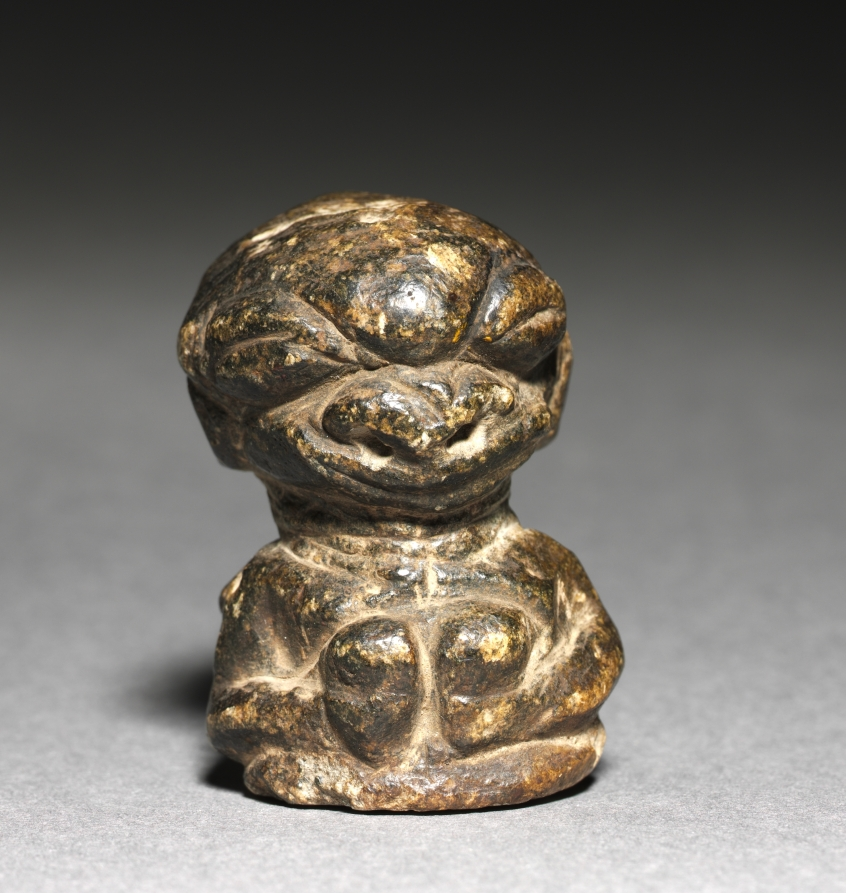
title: Female Figure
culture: Africa, West Africa, Sierra Leone, Sherbro Island, unknown maker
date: 1500s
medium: soapstone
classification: Sculpture